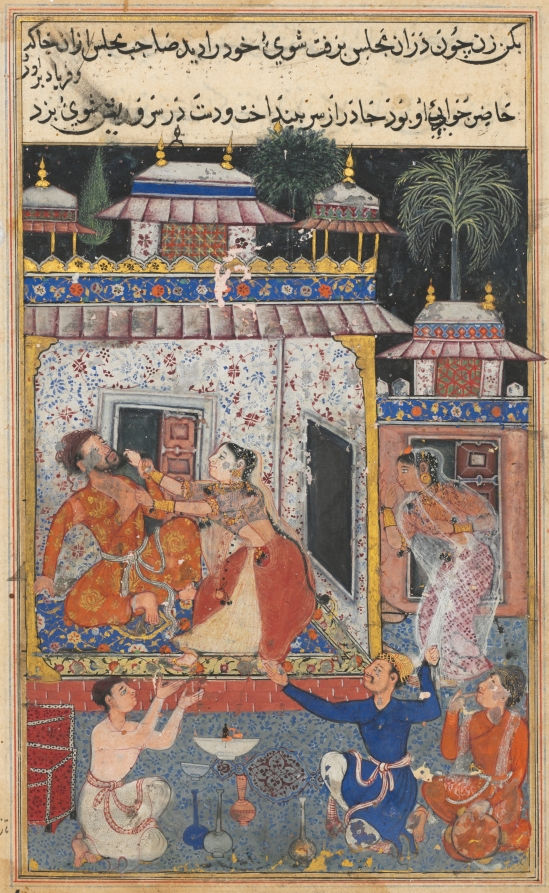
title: The deceitful wife assaults her erring husband, from a Tuti-nama (Tales of a Parrot): Eighth Night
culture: Mughal India, court of Akbar (reigned 1556–1605)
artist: Tara 1 (Indian, active 1550s-1590s)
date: c. 1560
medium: gum tempera, ink, and gold on paper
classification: Painting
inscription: tārā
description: A merchant’s wife carries on affairs while her husband is away. On the journey home, the merchant buys a woman’s company for the night. His own wife answers the call. When the merchant’s identity is revealed, the wife attacks him in order to distract from her own indiscretions. Townspeople surrounding the merchant’s chamber look on at the sound of the assault.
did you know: Both the brothel madam and one of the customers in the courtyard bite the index finger in a gesture of surprise.